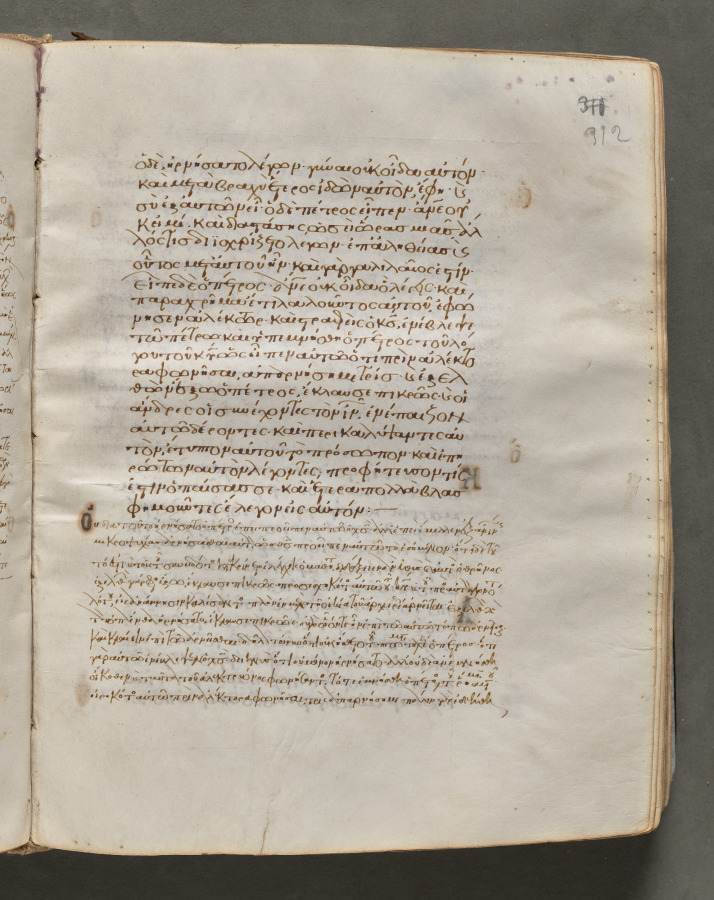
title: Text, folio 312 (recto), from a Gospel Book with Commentaries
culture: Byzantium, Constantinople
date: c. 1000–1100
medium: ink, tempera, and gold on vellum; leather binding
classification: Bound Volume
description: Each of the four gospels in this book opens on a page with brilliantly illuminated borders depicting the author of the text as well as birds—principally peacocks, symbols of the immortality of the soul—and fountains, representing the fountain of life and the salvation of the soul. This volume consists of 428 leaves with texts in Greek. Its level of sophistication suggests that it was probably written and decorated in a monastery in Constantinople.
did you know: Gospel books were carried in procession through Byzantine churches.